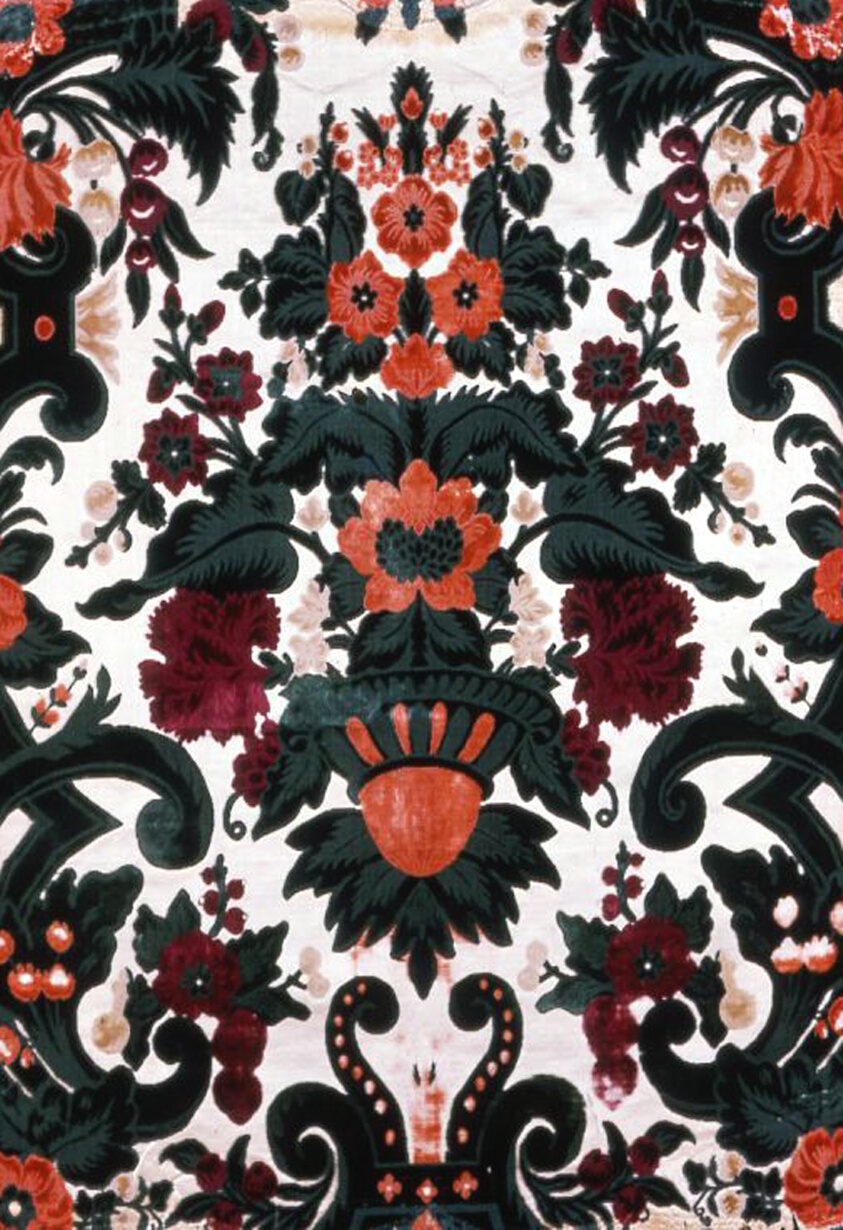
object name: Textile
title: Panel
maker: Italy, Genoa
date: 1700/25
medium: Silk, warp-float faced satin weave with supplementary binding wefts and supplementary pile warps forming cut and uncut velvet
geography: Italy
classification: textile; weaving - velvet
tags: floral arrangements